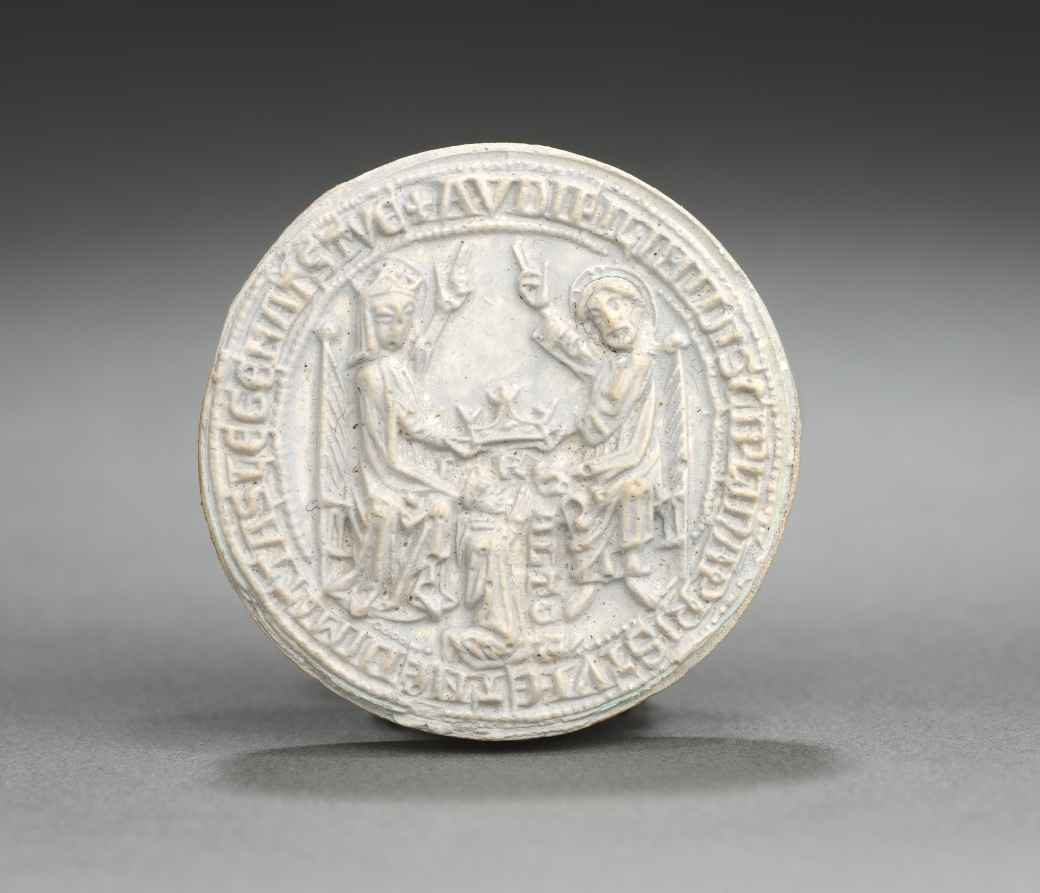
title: Almond-Shaped Seal: Coronation of the Virgin with a Kneeling Monk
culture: England or Germany, Gothic period, 14th century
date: 1300–1400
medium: gilded bronze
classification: Glyptic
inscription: Latin inscription from Proverbs 1:8: AUDI, FILI MI, DISCIPLINAM PATRIS TUI. ET NE DIMITTAS LEGE MATRIS TUI.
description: These seals were once used in monasteries as molds for making wax impressions that were routinely pressed onto letters, charters, and other documents as proof of authenticity.